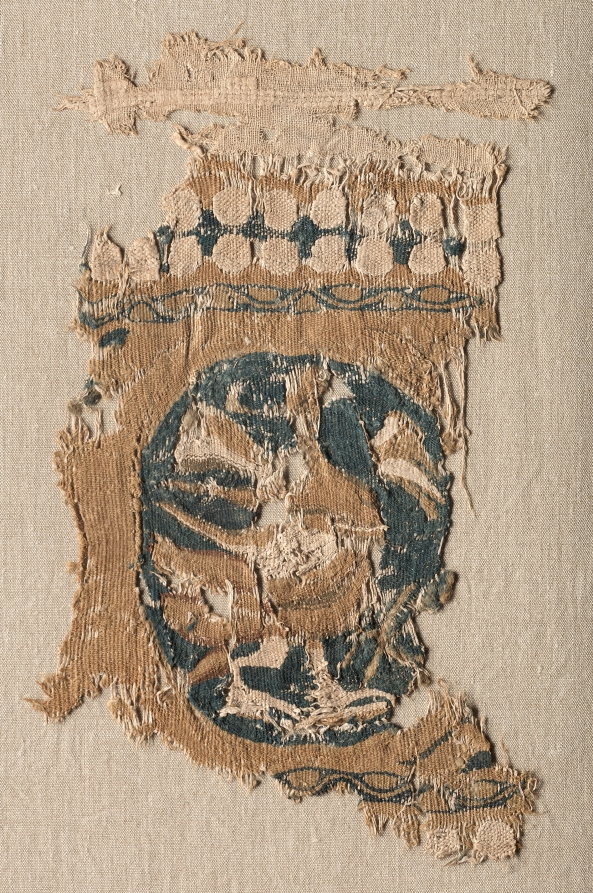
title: Fragment from a Hanging (?) with Roundel and Border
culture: Egypt, late Abbasid - early Tulunid period, 9th - 10th century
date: 800s - 900s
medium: tabby weave with inwoven tapestry ornament, linen and wool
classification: Textile